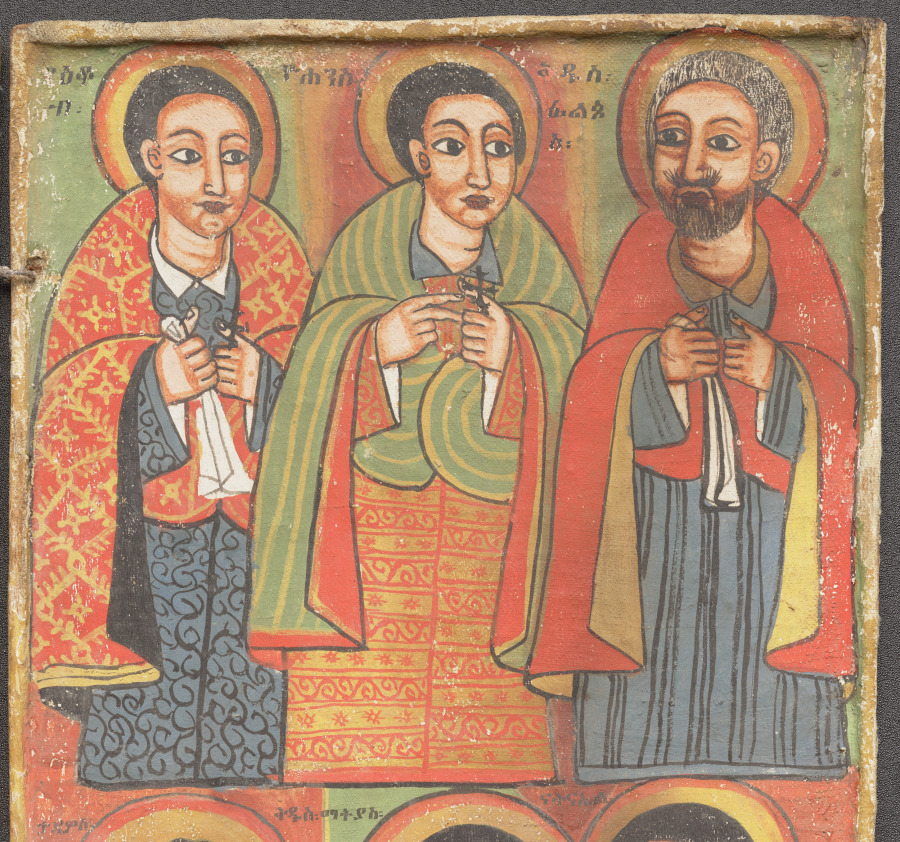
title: Diptych with Twelve Apostles & St. Paul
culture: Africa, East Africa, Ethiopia, presumably Gondär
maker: Workshop or Circle of Wäldä Maryam (Ethiopia, active mid- to late 1600s-early 1700s)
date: c. 1700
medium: Tempera, wood, textile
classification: Painting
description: Depicting 13 holy men, this diptych (two-panel painting) is sized for an Ethiopian Orthodox Christian church or elite home. It is painted in the bold, colorful style associated with royal court workshops from the early 1600s to the mid-1700s. Painter Wäldä Maryam (or someone he trained) set this scene of Christ’s apostles in the context of his homeland. Each saint wears fashionable clothing imported from India. While they are posed and dressed similarly to emphasize their group identity, the artist portrayed their faces and hairstyles individually. Captions in Ge’ez––an eastern African language dating to the 400s BCE––identify each by name.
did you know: Captions written in the language Gəˁəz identify each holy man by name. This African language is nearly 2,500 years old!